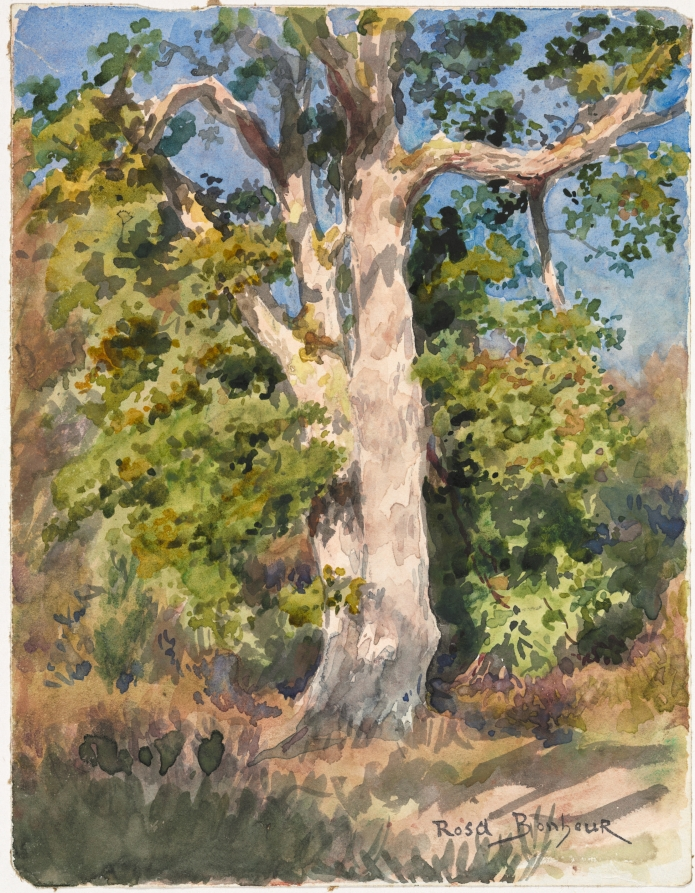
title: Tree Study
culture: France, 19th century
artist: Rosa Bonheur (French, 1822–1899)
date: c. 1842–99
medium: watercolor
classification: Drawing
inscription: inscribed in gray ink, lower right: "Rosa Bonheur"